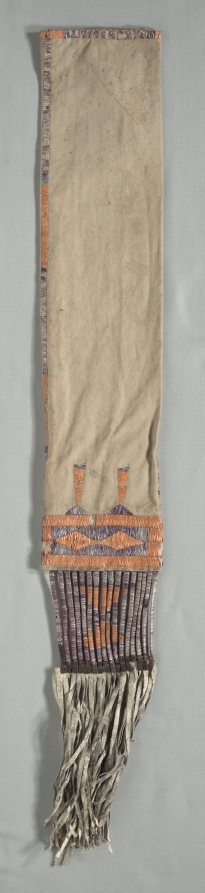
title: Pipe Bag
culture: Plains, Lakota (Sioux), 19th century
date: c. 1870–1890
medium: canvas and quill work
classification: Textile